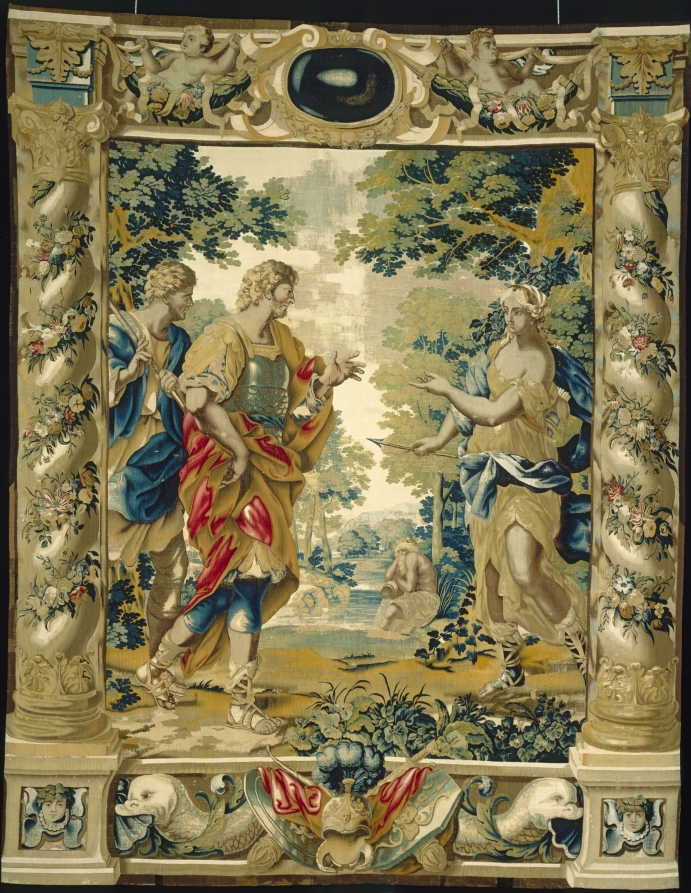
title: Venus tells Aeneas and his friend Achates to go to Carthage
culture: Belgium, 17th century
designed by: Giovanni Francesco Romanelli (Italian, 1610–1662)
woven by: Michael Wauters (Flemish, 1679)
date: 1679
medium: tapestry weave: silk and wool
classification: Tapestry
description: Venus, seen here dressed as a huntress, advises her son, Aeneas, to visit Dido, queen of Carthage. Venus wants her son to stop wandering and marry the queen.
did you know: This tapestry is one from a series of eight that depicts the tragic love story of Dido and Aeneas which were gifted to the museum for display in the armor court.